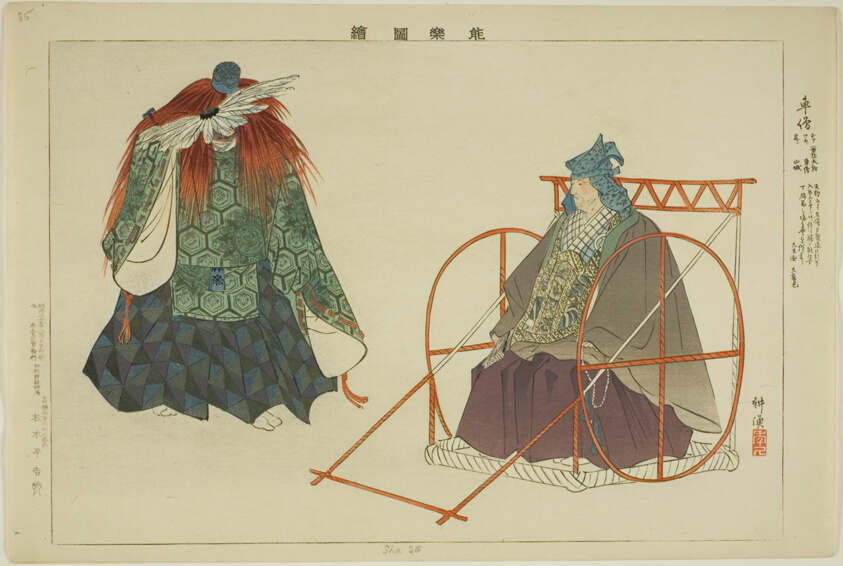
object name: Print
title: Shaso, from the series "Pictures of No Performances (Nogaku Zue)"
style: Japanese (culture or style)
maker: Tsukioka Kogyo; Japanese, 1869-1927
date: 1898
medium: Color woodblock print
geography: Japan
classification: woodblock print; print; asian art